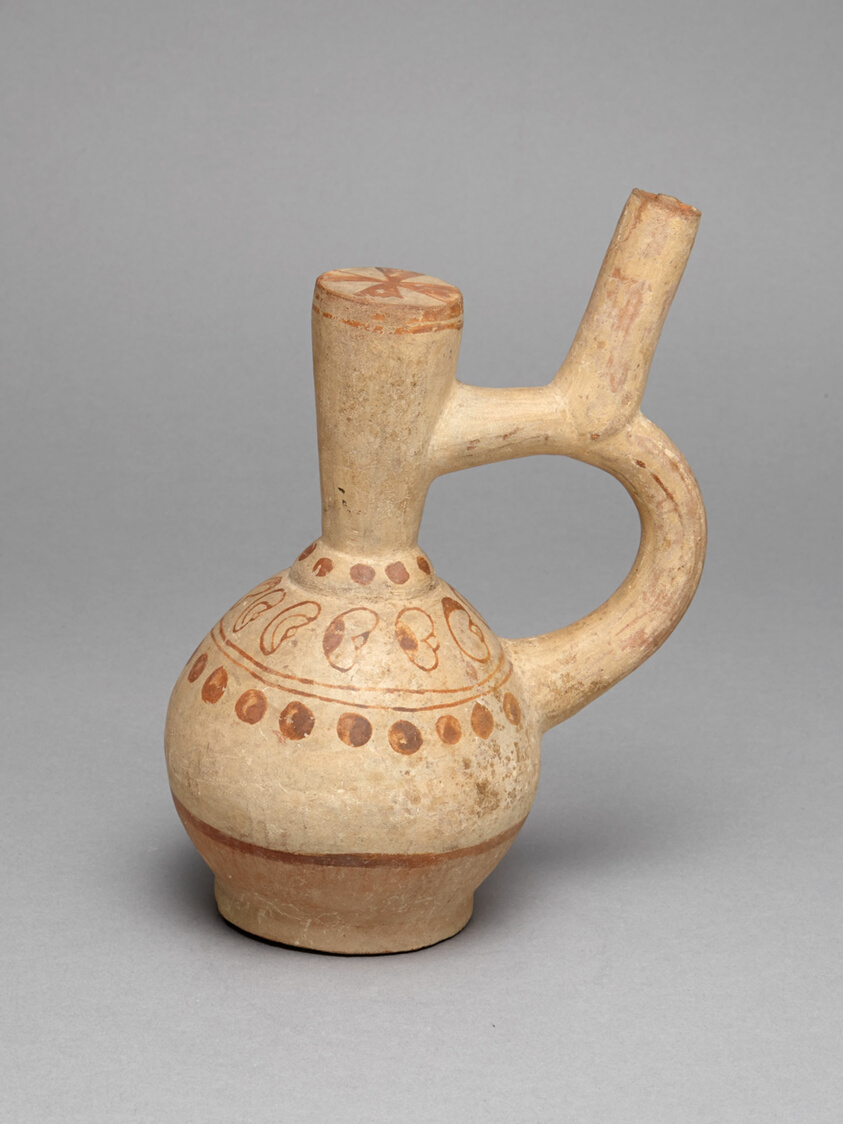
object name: Vessel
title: Handle Spout Vessel Depicting Rows of Beans and Dots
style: moche, andes, Arts of the Americas, south american, andean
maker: Moche (Chicama, La Libertad, north coast, Peru)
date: 100 BCE–500 CE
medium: Ceramic and pigment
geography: Peruvian North Coast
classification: earthenware; ceramics; vessel; art of the americas